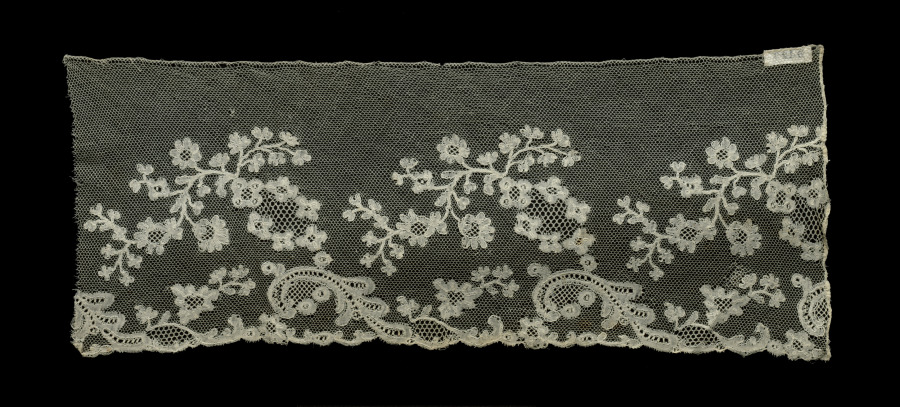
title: Lace Flounce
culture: England, Bedfordshire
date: 1700s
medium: Bobbin lace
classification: Lace